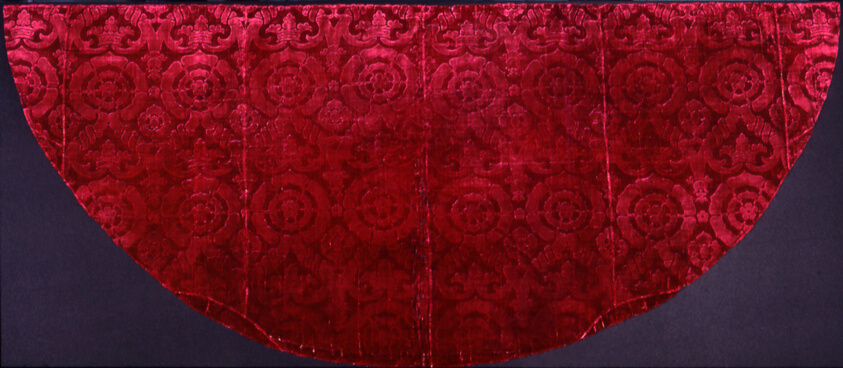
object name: Textile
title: Cope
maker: Venice, Italy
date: c. 1500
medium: Silk, satin weave cut pile-on-pile solid velvet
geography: Venice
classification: textile; costume; liturgical; weaving - velvet